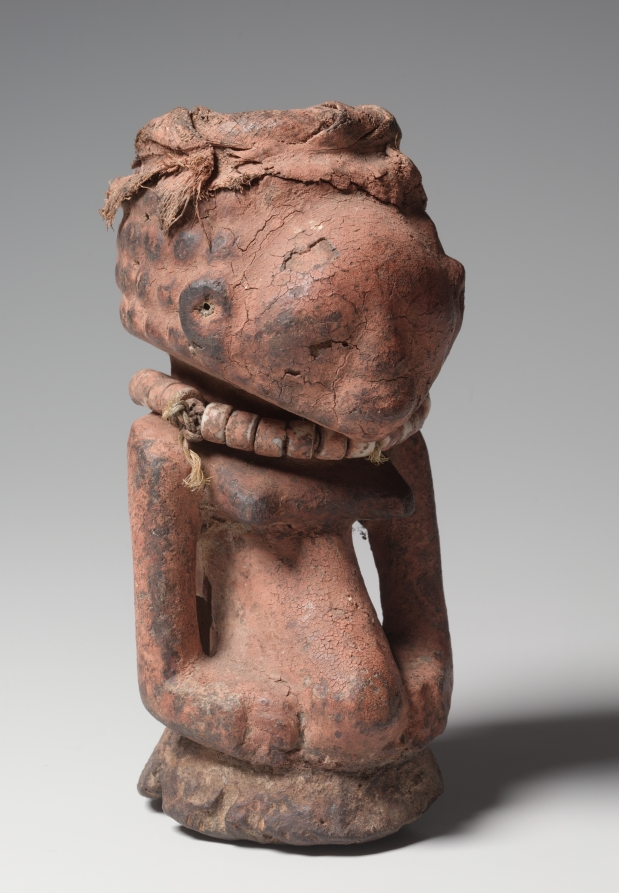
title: Figure (Nkishi)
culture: Africa, Central Africa, Democratic Republic of Congo, Luba-style maker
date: late 1800s–early 1900s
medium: Wood, organic materials (including resin and soil), plant fiber, and glass beads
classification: Sculpture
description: The substances contained in its cloth-covered cranial cavity indicate that this half-figure belongs to the broad category of charms or “power objects” that the Luba call mankishi. It was used by a ritual expert and functioned in a variety of rituals dealing with healing, protection, divination, or jurisdiction. Often such power figures were carved by the ritual experts rather than by professional artists.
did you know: Unlike most Luba arts, this figure is not connected to the royal court.